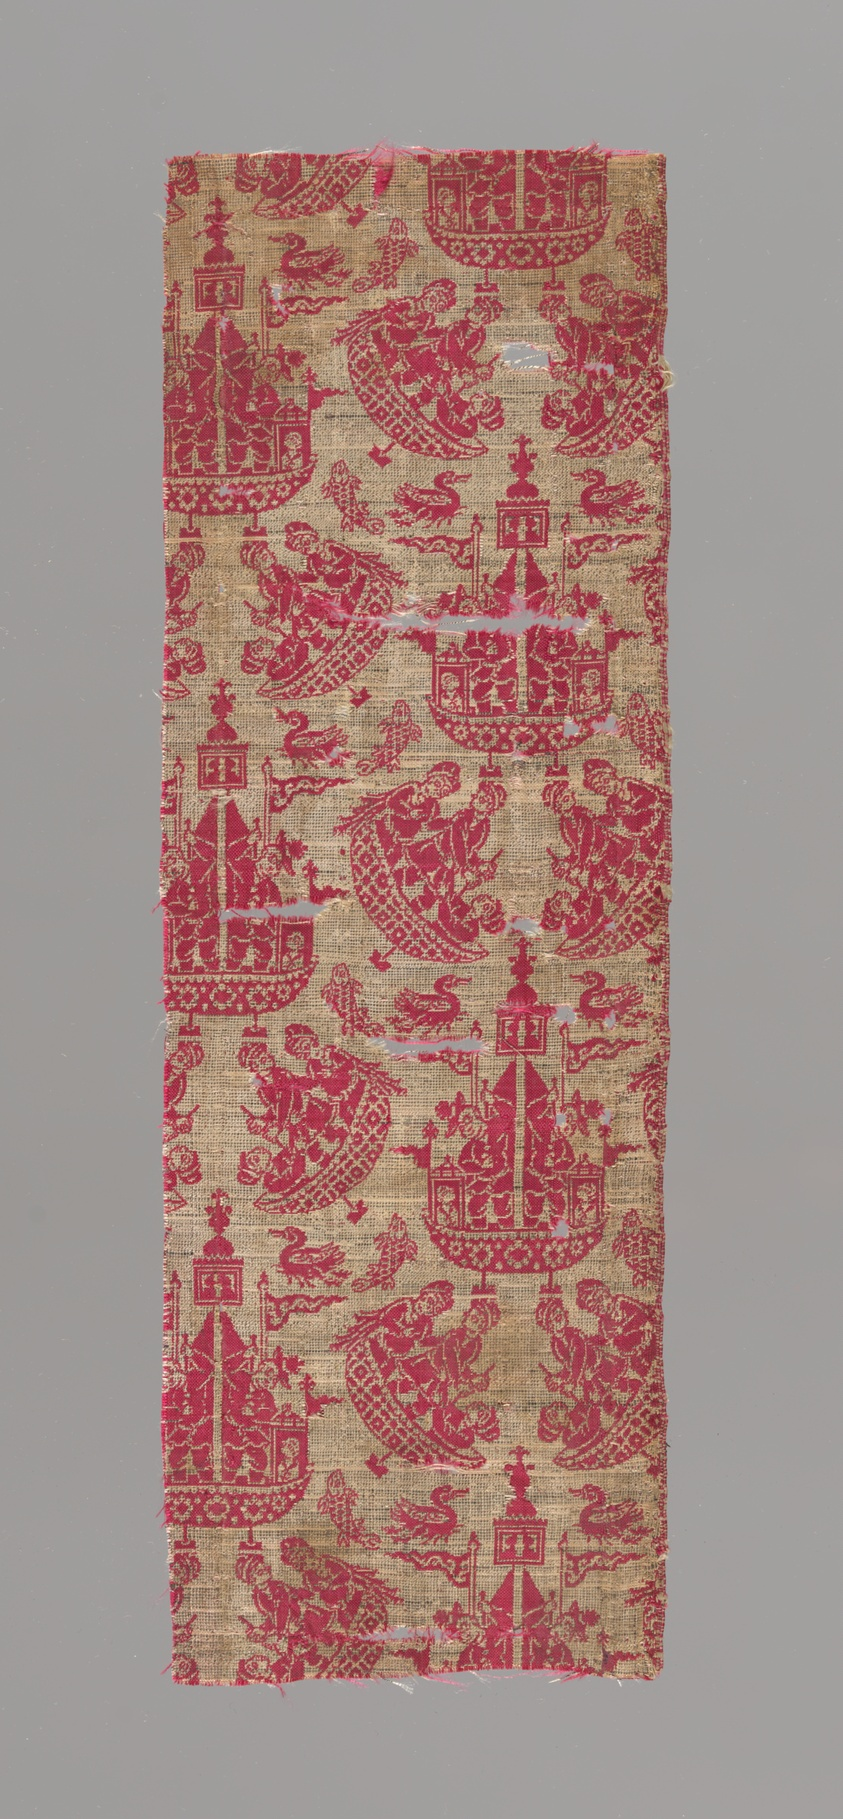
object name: Textile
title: Fragment (Dress Fabric)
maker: Iran (Persia) or India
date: 1601/25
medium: Silk, double cloth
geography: Persia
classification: textile; weaving